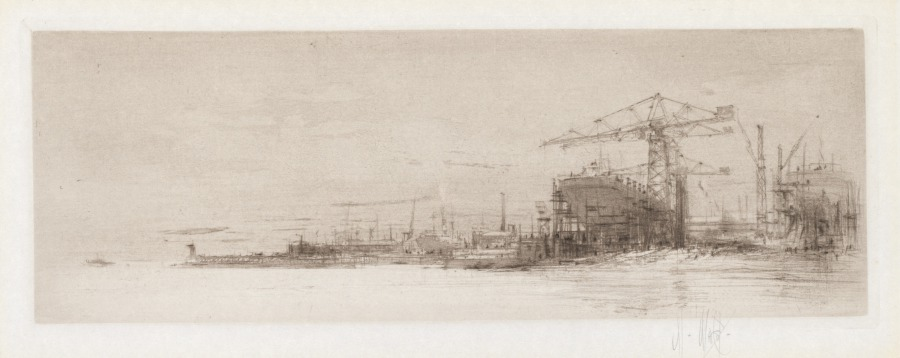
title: The Clyde from the series The Arteries of Great Britain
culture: Britain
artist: William Walcot (British, 1874–1943)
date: 1922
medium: etching and aquatint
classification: Print